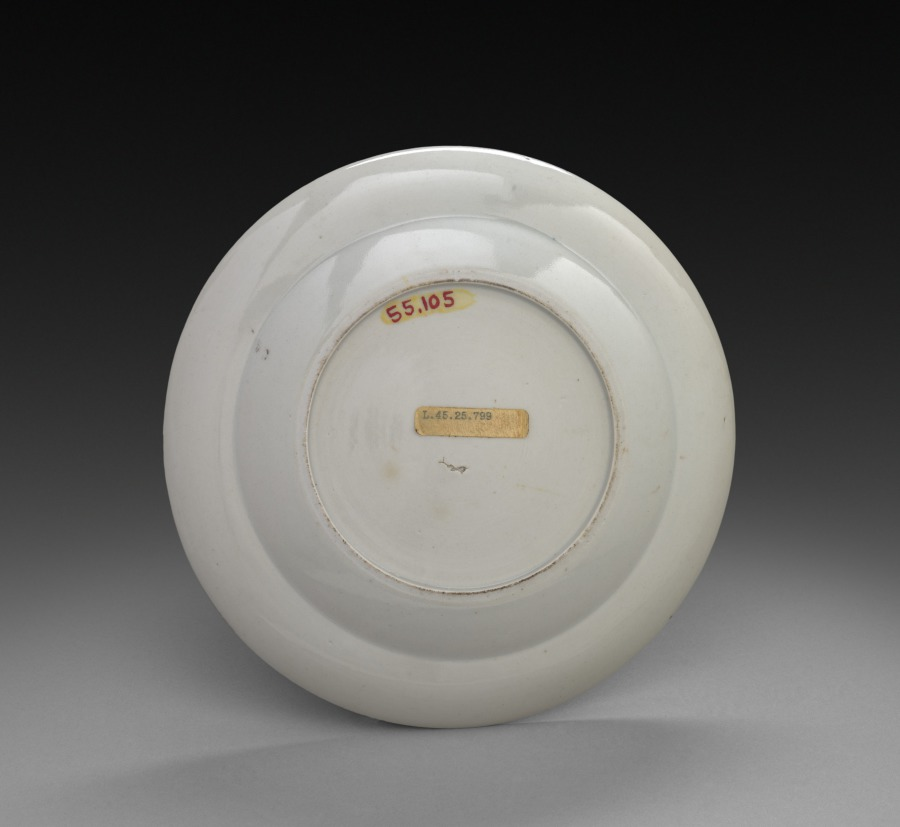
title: Plate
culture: China, Chinese Export, 18th century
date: 1785–1800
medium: porcelain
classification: Ceramic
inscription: "AD' ARAUJO DE ACEBEDO."